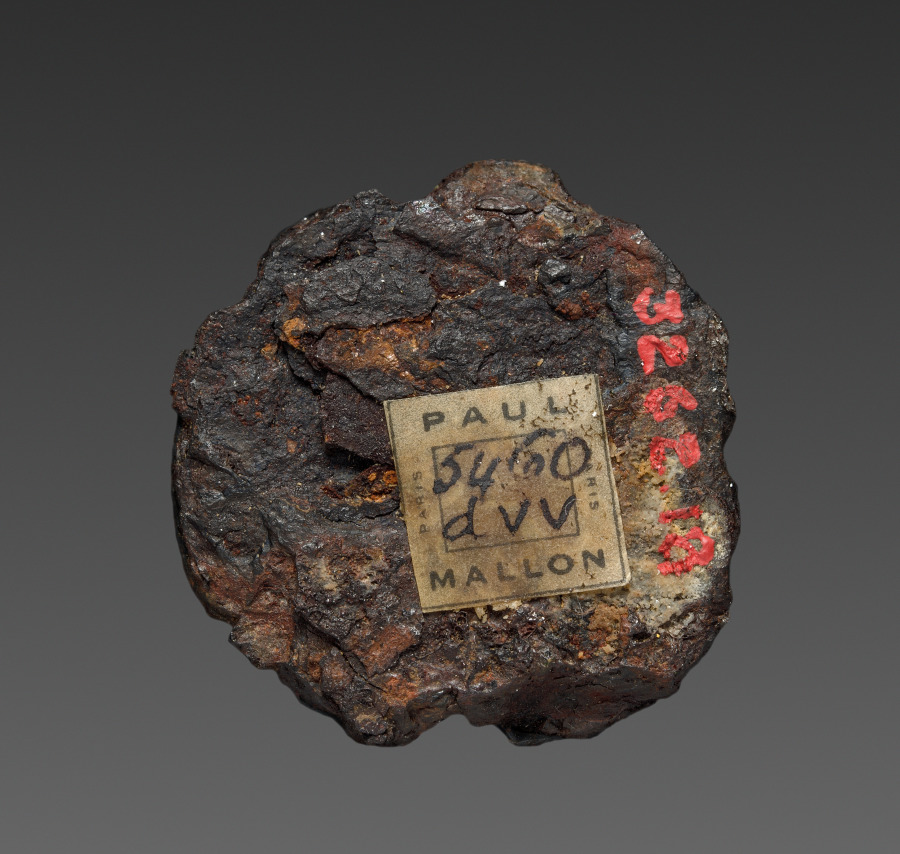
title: Brooch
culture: Merovingian, Burgundian, Migration period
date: 600s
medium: bronze and silver overlay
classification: Jewelry